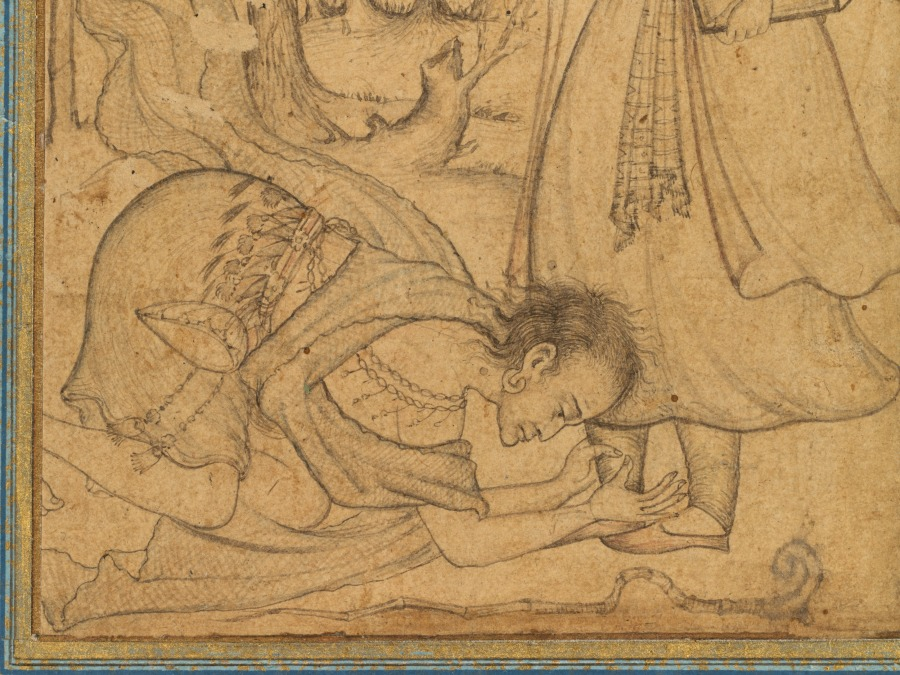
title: A holy man prostrating himself before a learned prince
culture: Mughal India, court of Akbar (reigned 1556–1605)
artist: attributed to Manohar (Indian, active late 1500s)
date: c. 1585; border added probably 1700s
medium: ink on paper, laid down with borders of gold-decorated blue paper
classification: Painting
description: Manohar riffs on the work of his father, Basavana, by showing a holy man bowing at the feet of a prince, instead of another holy man. Those who could recognize the relationship between this work and that of his father (CMA 2013.296) would impress gatherings of courtly connoisseurs, who prided themselves on being able to identify the hand of individual artists just by looking at the paintings. Recitation of poetry would accompany the viewing of paintings and drawings. Virtuoso artists reflected glory on their patrons. As an Islamic ruler, Akbar and his court participated in these activities—a new purpose for art that Indian artists had to learn.